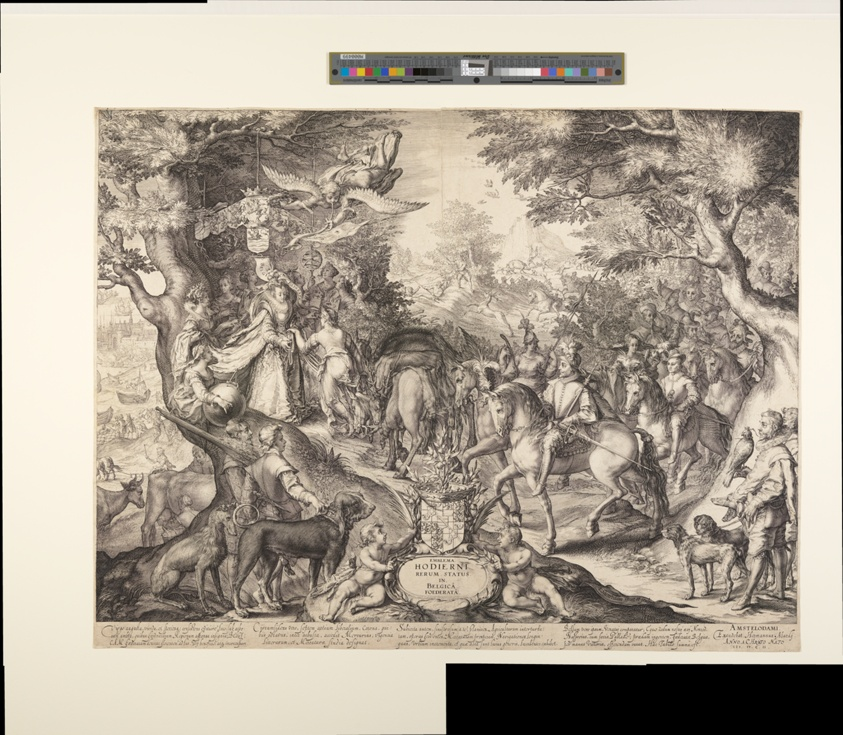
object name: Print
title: Allegory of the Flourishing State of the United Provinces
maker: Jan Saenredam (Dutch, 1565–1607)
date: 1602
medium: Engraving on ivory laid paper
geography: Netherlands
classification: engraving; paper; print; prints and drawing